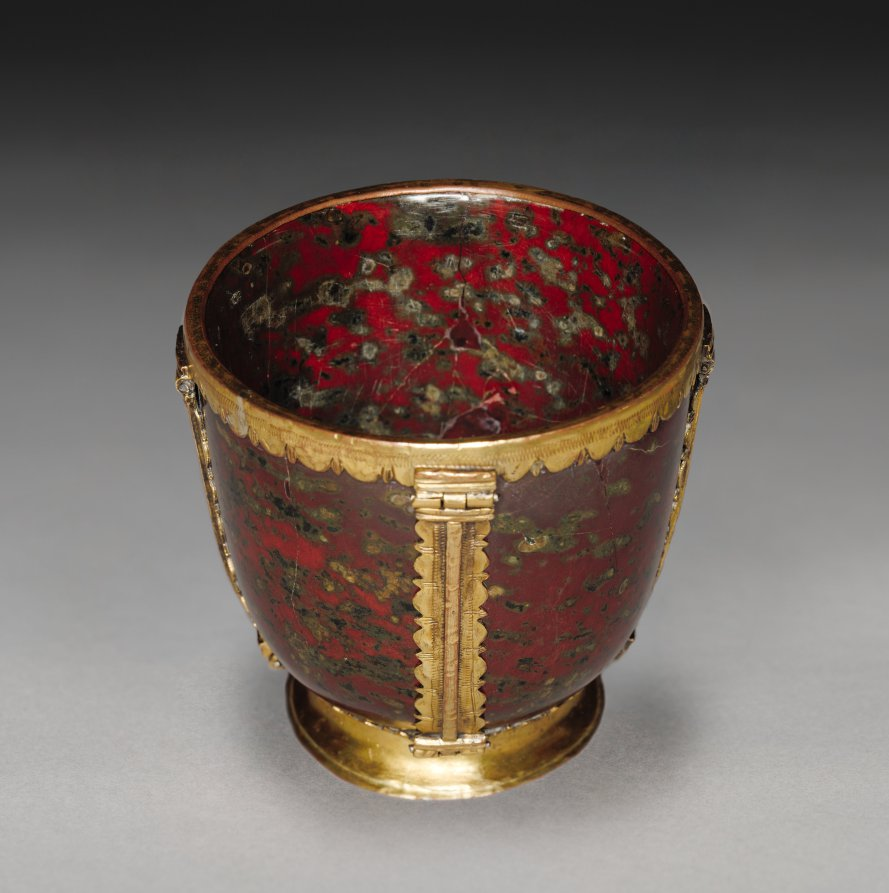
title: Calyx (Chalice)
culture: Byzantium, Middle Byzantine (843-1261)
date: 900s-1000s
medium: blood jasper (heliotrope) with gilt-copper mounts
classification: Glyptic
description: This hardstone vessel is shaped as a small bowl-shaped beaker which tapers slightly towards the base. It is crafted from jasper, a form of chalcedony, an opaque hardstone. The stone appears in a variety of colors, but in this instance is of the type known as "blood jasper," which assumes a deep ruby red color. The surface is highly polished and the vessel in enclosed in handsome gilt-copper mounts featuring a repeating lambrequin-type ornament. The calyx belongs to an exclusive and rare genre of object known today through about 30 surviving examples, most of which are preserved in the Treasury of San Marco in Venice. Because of its deep red color, blood jasper was highly prized by the Byzantines who saw it as a symbol of the blood of Christ. The original function of the vessel cannot be known with certainty. It may have assumed either a secular or liturgical function; however, the use of blood jasper would support the view that the calyx functioned as a liturgical chalice. Chalices in Byzantine Orthodoxy assumed multiple forms. Objects of this quality, materials, and execution are typically associated with circles of the Byzantine court. Such objects were often gifted to churches.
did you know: The Byzantines inherited their love of hardstones and their skill at carving them from the Romans.